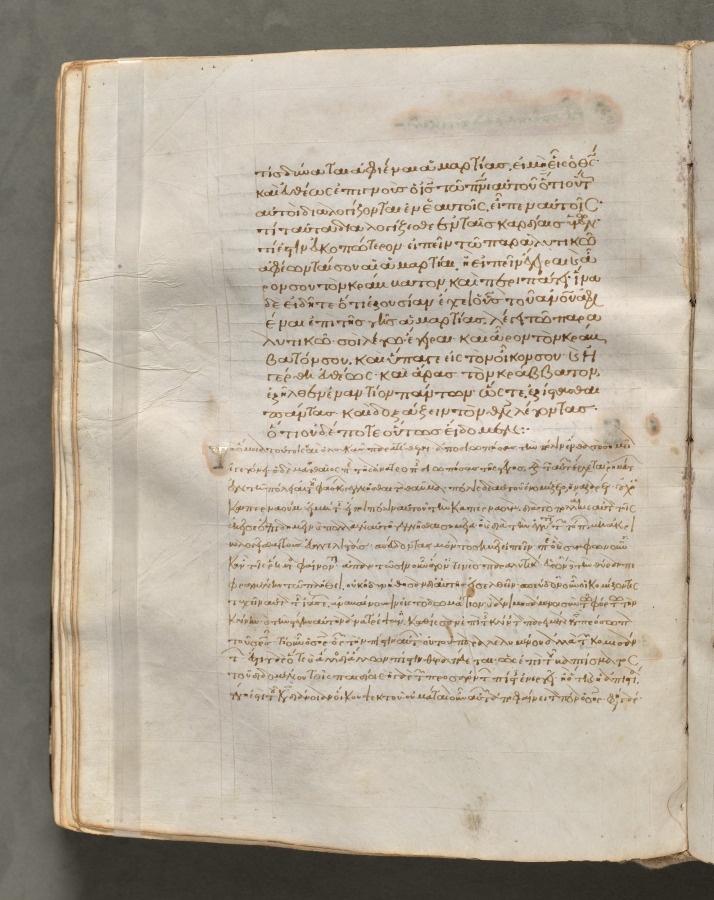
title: Text, folio 137 (verso), from a Gospel Book with Commentaries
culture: Byzantium, Constantinople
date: c. 1000–1100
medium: ink, tempera, and gold on vellum; leather binding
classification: Bound Volume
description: Each of the four gospels in this book opens on a page with brilliantly illuminated borders depicting the author of the text as well as birds-principally peacocks, symbols of the immortality of the soul-and fountains, representing the fountain of life and the salvation of the soul. This volume consists of 428 leaves with texts in Greek. Its level of sophistication suggests that it was probably written and decorated in a monastery in Constantinople.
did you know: Gospel Books were carried in procession through Byzantine churches.